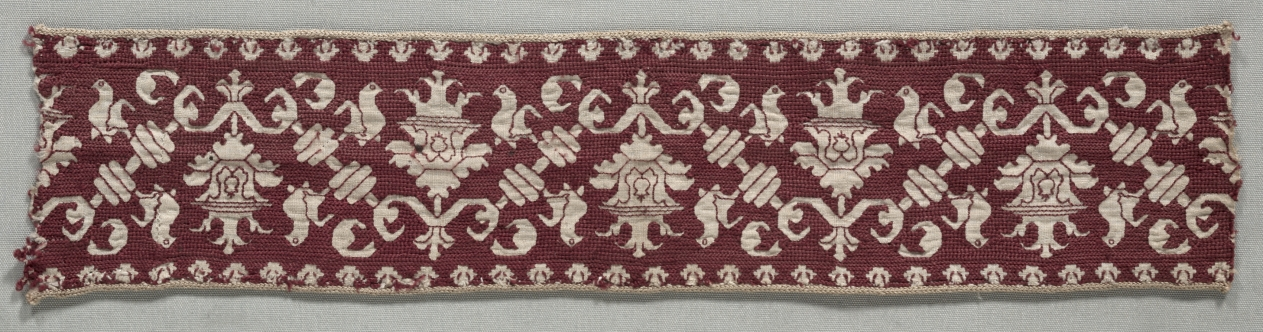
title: Embroidered Strip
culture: Italy, 16th century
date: 1500s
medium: embroidery; silk on linen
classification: Embroidery